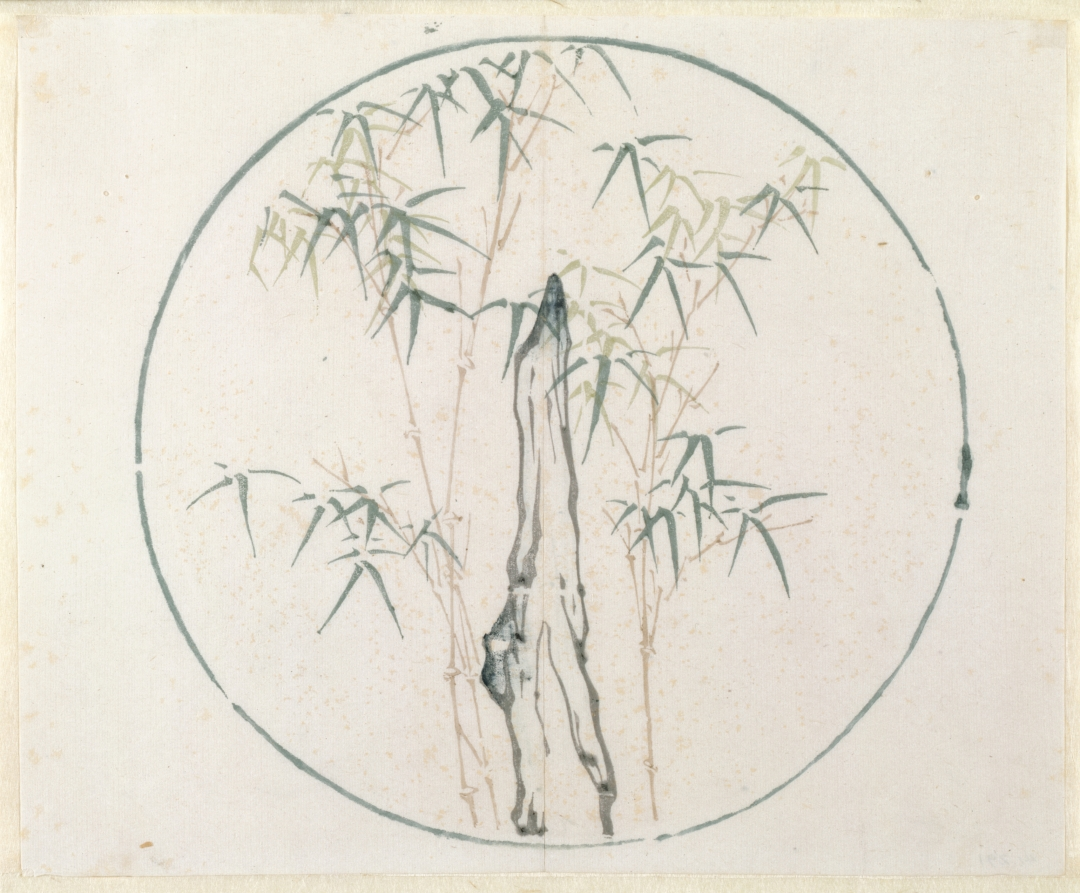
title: Bamboo and Rock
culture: China, Ming dynasty (1368-1644) or later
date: 1368–1644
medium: color woodblock print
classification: Print